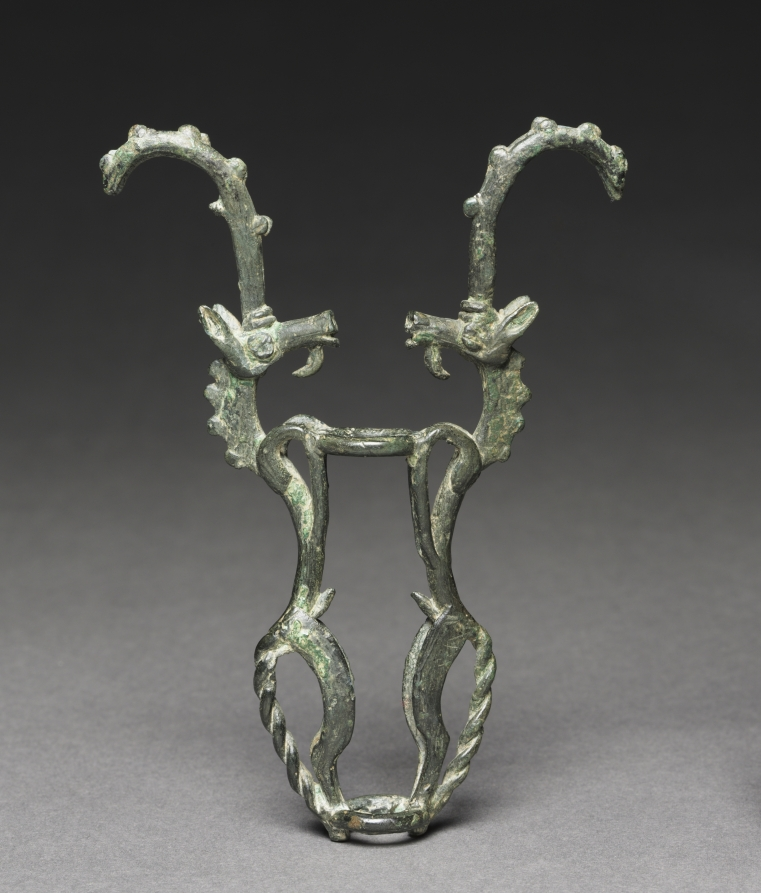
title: Ibex Standard Finial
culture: Iran, Luristan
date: c. 700–600 BCE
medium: bronze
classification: Sculpture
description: This standard finial, a decorative tube perhaps used as a military emblem, is made of two abstracted ibexes. Their elongated forelegs form a ring where a pole may have once been inserted. An additional horizontal bar extends from their chests to support the ring. The cast bronze ibexes are decorated with ridged horns, curled beards, and twisted tails. Their hind legs join another ring. This standard is likely from Luristan, home to a seminomadic people who created a strong metalworking industry in the Iron Age.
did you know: Ibexes are wild goats from the Zagros Mountains of Iran and the Caucasus.